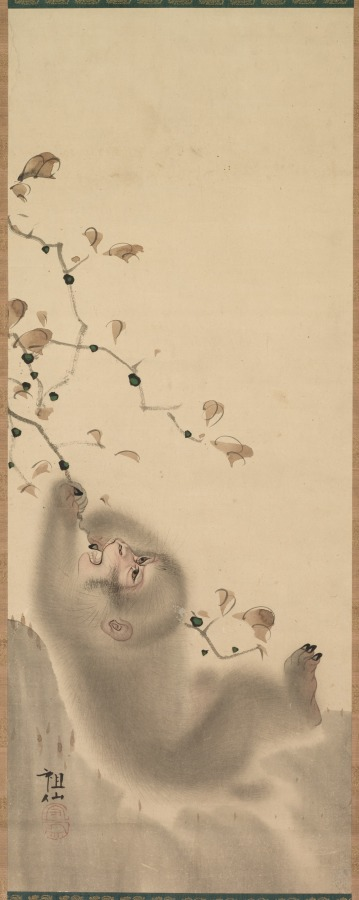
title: Monkey Hanging on to a Branch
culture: Japan, Edo period (1615–1868)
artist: Mori Sosen (Japanese, 1747–1821)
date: 1780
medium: hanging scroll; color on paper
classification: Painting